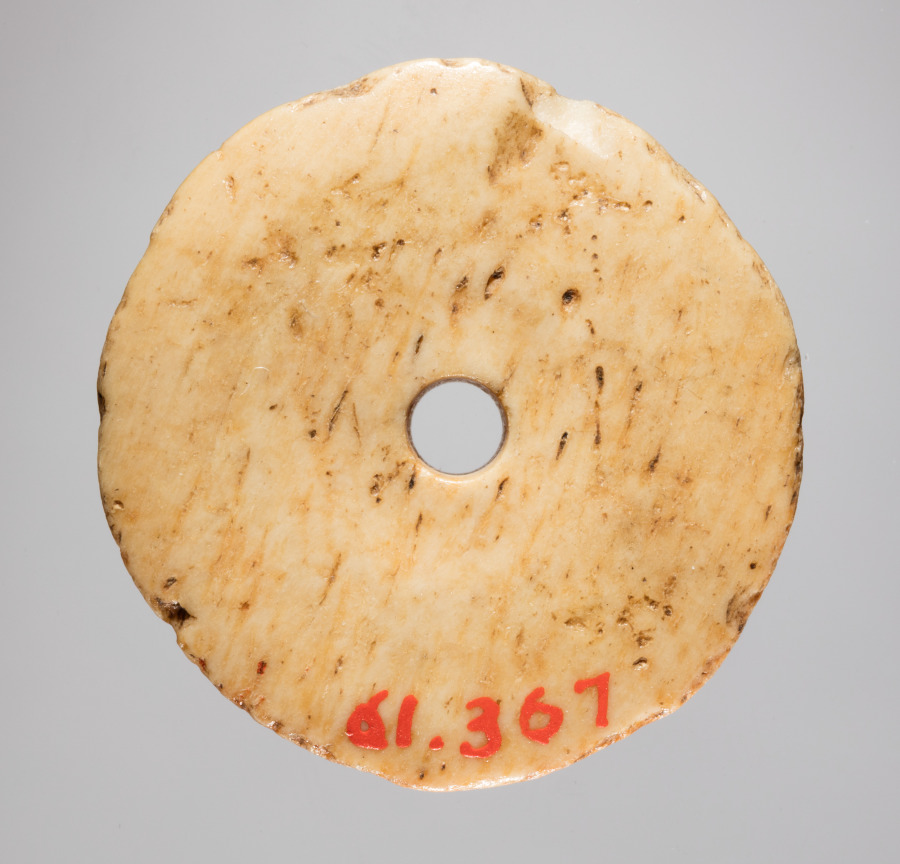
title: Spindle Whorl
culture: Iran, early Islamic period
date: 700s - 900s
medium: bone, incised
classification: Spindle Whorl